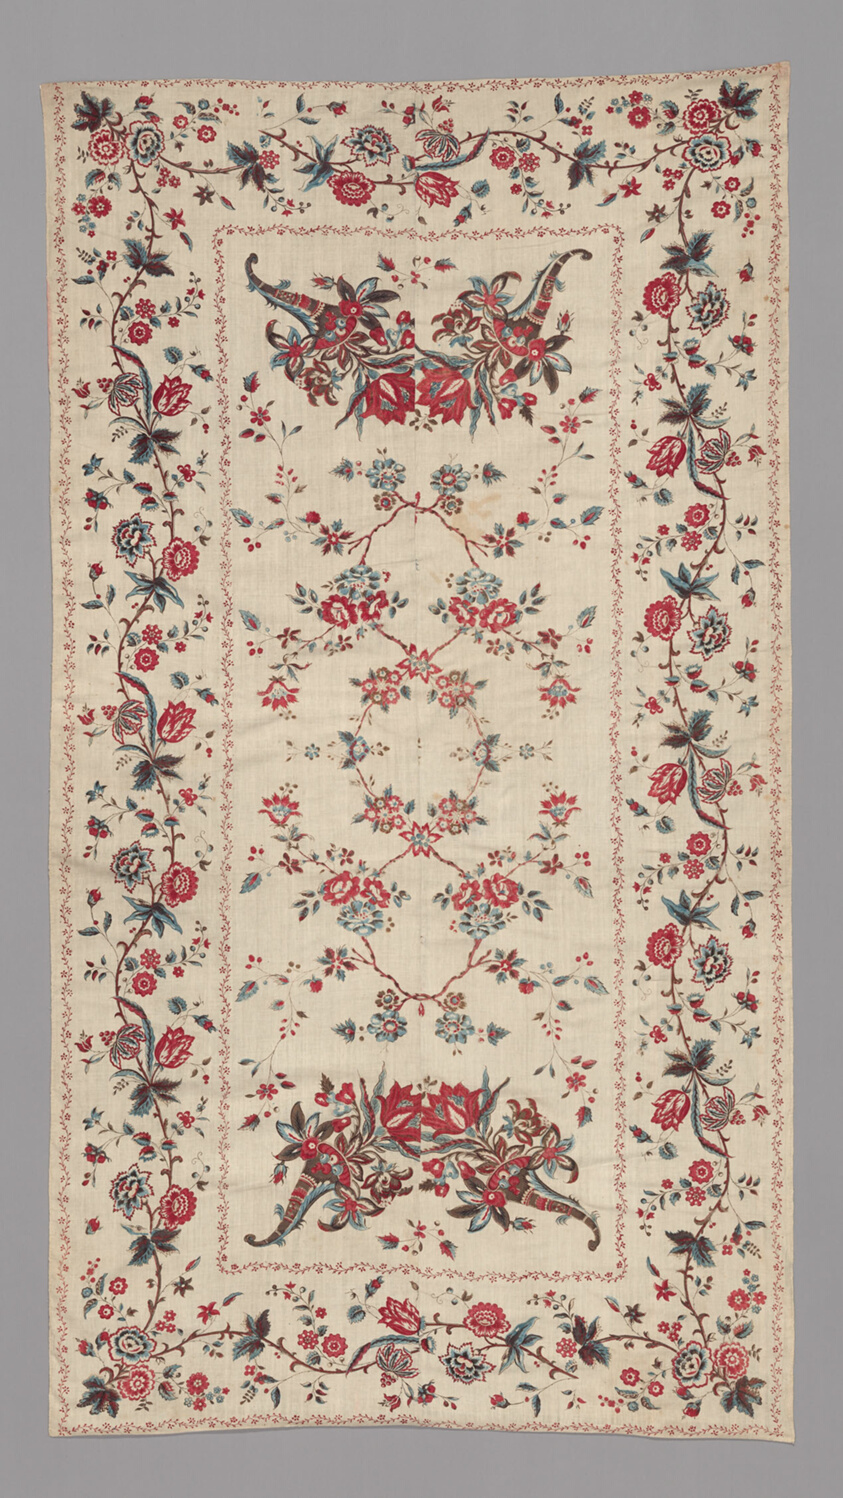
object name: Textile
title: Cover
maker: India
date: 18th century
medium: Printed; pieced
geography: India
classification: textile; weaving - printed